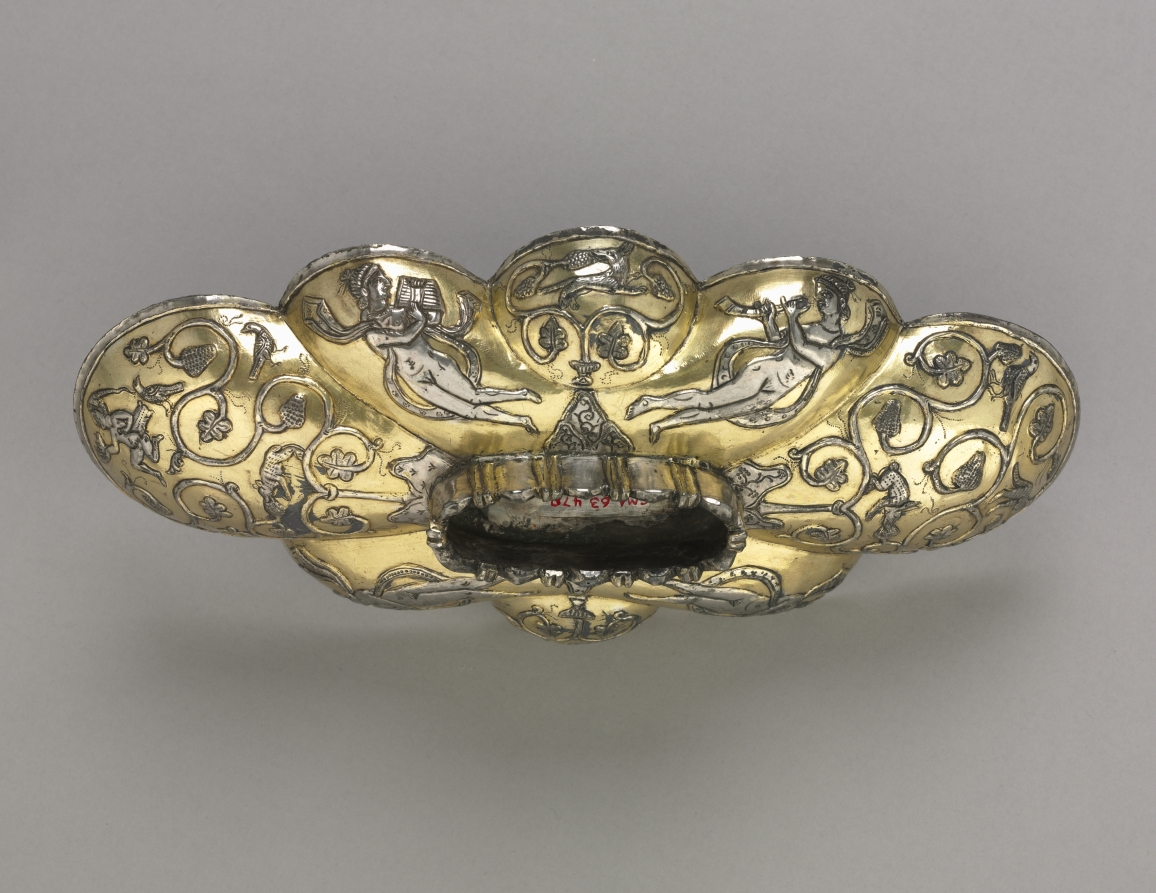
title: Bowl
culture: Iran, Sasanian Empire (224–651 CE)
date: 300–500 CE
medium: silver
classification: Metalwork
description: The decoration on this bowl—a vine with a little nude, accompanied by musicians drinking wine from a rhyton—is related to the Hellenistic cult of Dionysos, or Bacchus, which was brought to Iran by the Greeks and became absorbed into the cult of Anahita.